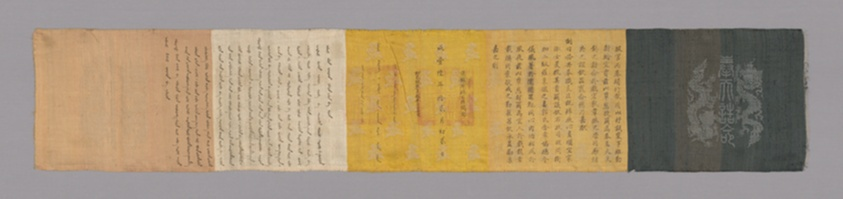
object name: Textile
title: Imperial Edict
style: qing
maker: China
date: 1856–1857, Qing dynasty (1644–1911)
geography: China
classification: textile; weaving